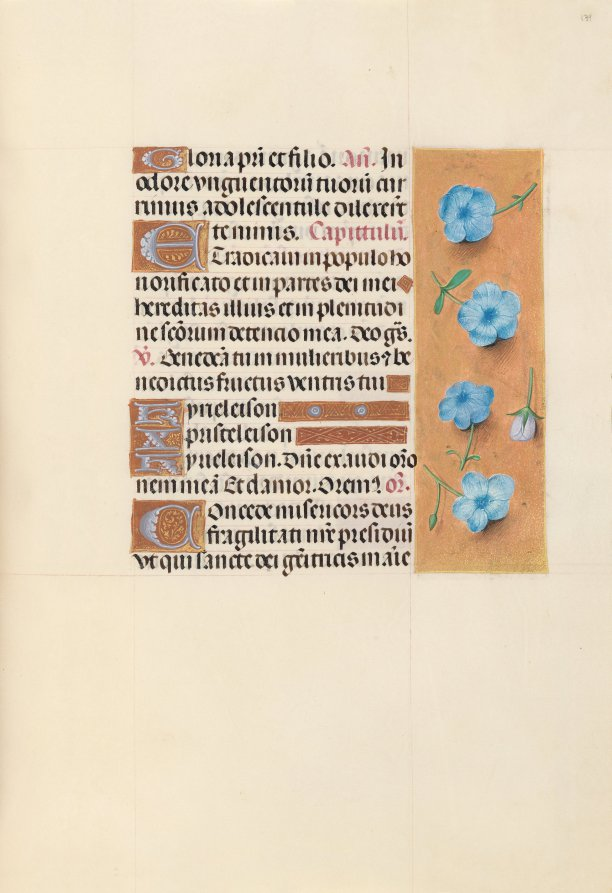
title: Hours of Queen Isabella the Catholic, Queen of Spain: Fol. 139r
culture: Flanders, Ghent and Bruges, late 15th century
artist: Master of the First Prayerbook of Maximillian (Flemish, c. 1444–1519)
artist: and Associates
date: c. 1500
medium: ink, tempera, and gold on vellum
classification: Bound Volume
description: This manuscript was illuminated by a circle of at least five highly organized manuscript painters active in the Flemish cities of Ghent and Bruges. The principal illuminator was Alexander Bening, who painted the majority of the book's miniatures. Manuscripts produced by this circle of artists are renowned for the decoration of their borders, which typically feature a rich variety of realistically-painted flowers, birds, and butterflies. This prayer book, called a book of hours, was intended not for a cleric, but for the private devotions of a lay person-in this case, Isabella the Catholic, Queen of Spain (1451-1504). Isabella's coat of arms embellishes the book's frontispiece. It is unlikely that the book was commissioned by the Queen herself; rather, she probably received it as a diplomatic gift from someone courting her patronage, perhaps Cardinal Francisco Jimenez de Cisneros. A Franciscan friar, Jimenez was dependent upon Isabella for his advancement, first to the post of Queen's confessor in 1492, and then to Archbishop of Toledo in 1495.